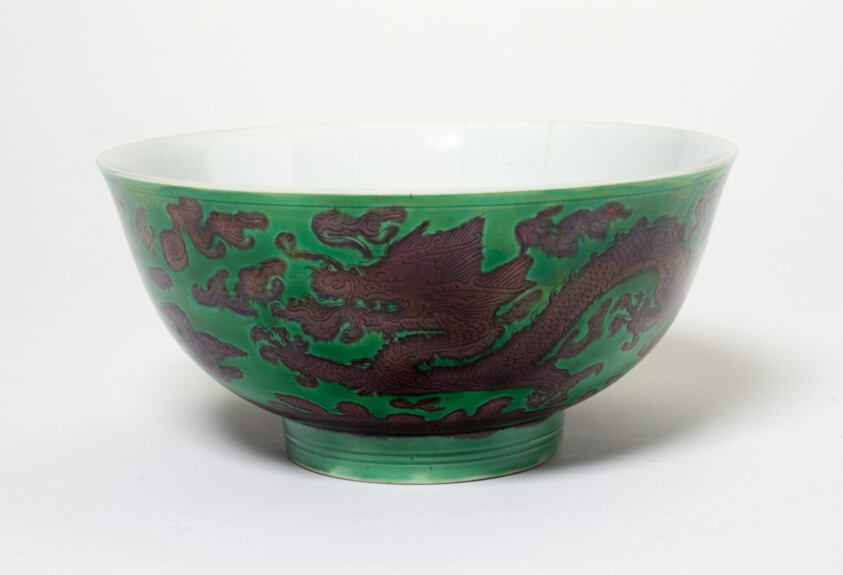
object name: Vessel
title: Bowl with Dragons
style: Chinese (culture or style)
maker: China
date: Qing dynasty (1644–1911), Kangxi reign mark and period (1662–1722)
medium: Porcelain painted in overglaze enamels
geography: China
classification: bowl; porcelain; dish (vessel); asian art; ceramics; vessel